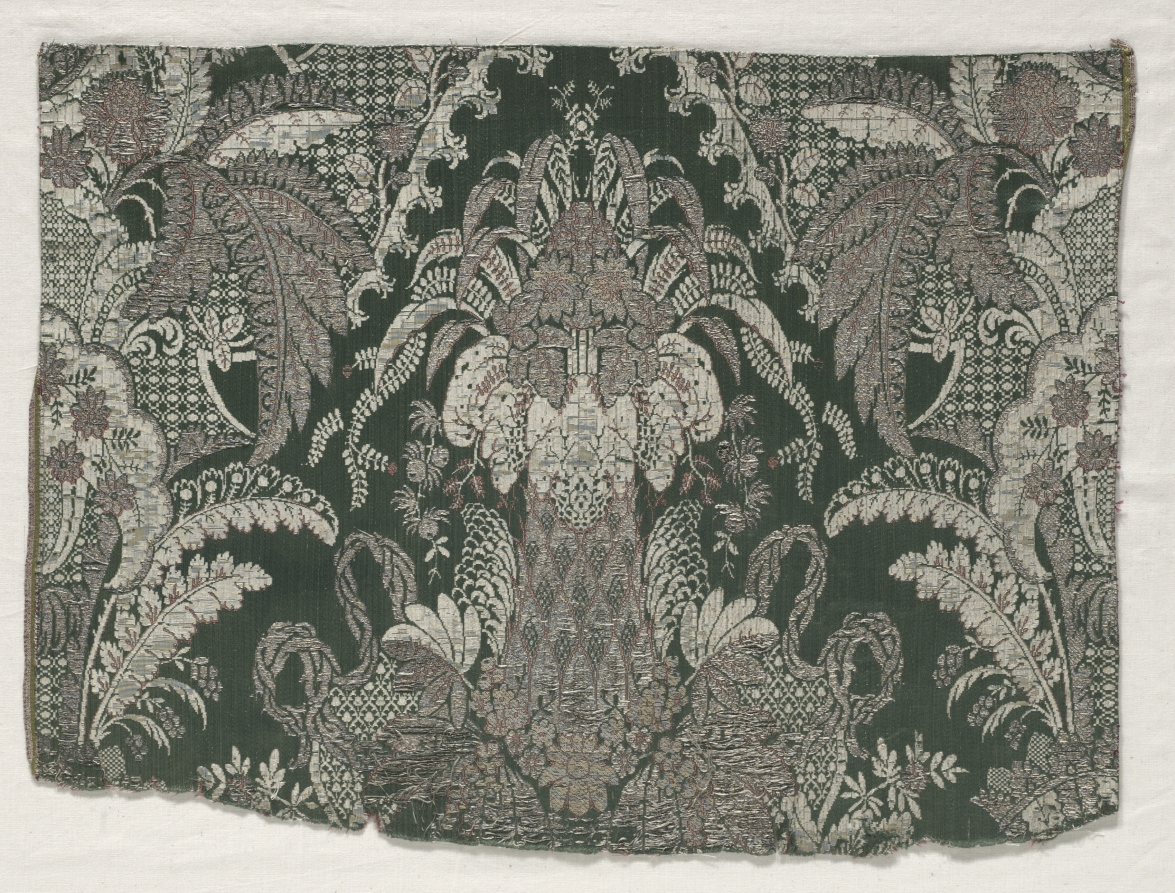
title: Brocade Fragment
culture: France, early 18th century, late Baroque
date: early 1700s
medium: brocaded silk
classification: Textile